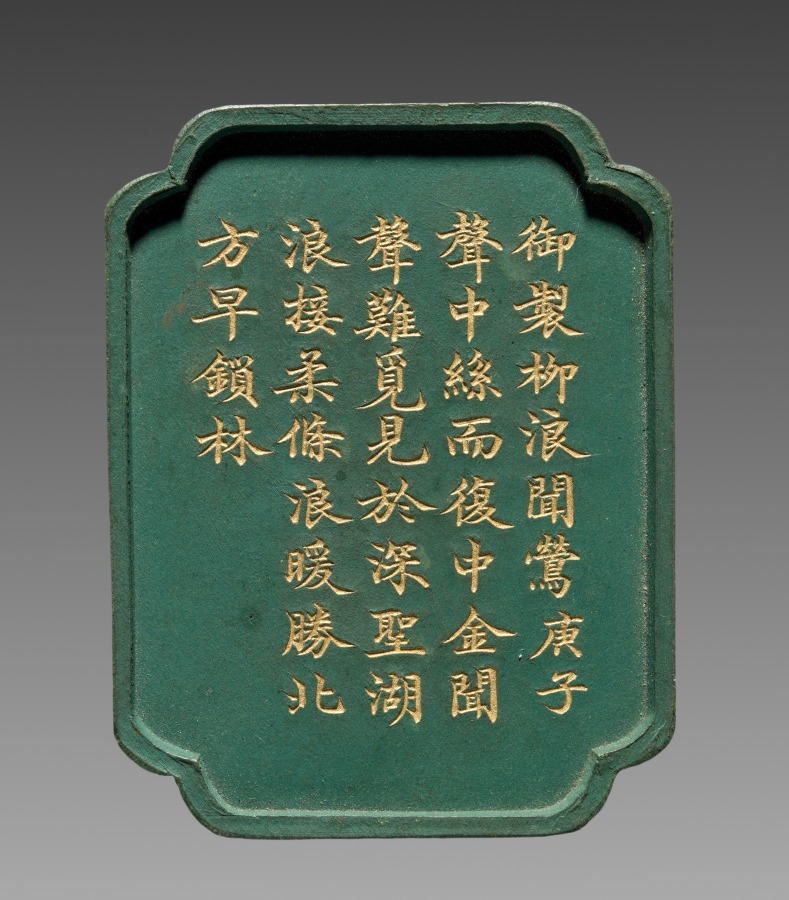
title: Ink Stick from an Imperially Commissioned Set of Ink Stick with Images and Poems of Famous West Lake Sites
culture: China, Qing dynasty (1644–1911), Qianlong reign (1736–95)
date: 1780–94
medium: Molded ink in green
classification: Miscellaneous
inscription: 乾隆年製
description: This is one of ten ink cakes of different shapes and colors stored in an exquisite lacquer box. Each is inscribed in gold with a poem by the Qianlong emperor, praising the ten famous sights of the Westlake in Hangzhou, near Shanghai. The Westlake is famous for its natural beauty; it was a favorite imperial destination and remains a tourist attraction today. Ink cakes (also called ink sticks) are dissolved with the addition of water and ground on the surface of a flat stone into liquid ink for painting and calligraphy. The precious ink cakes here, however, have never been used.